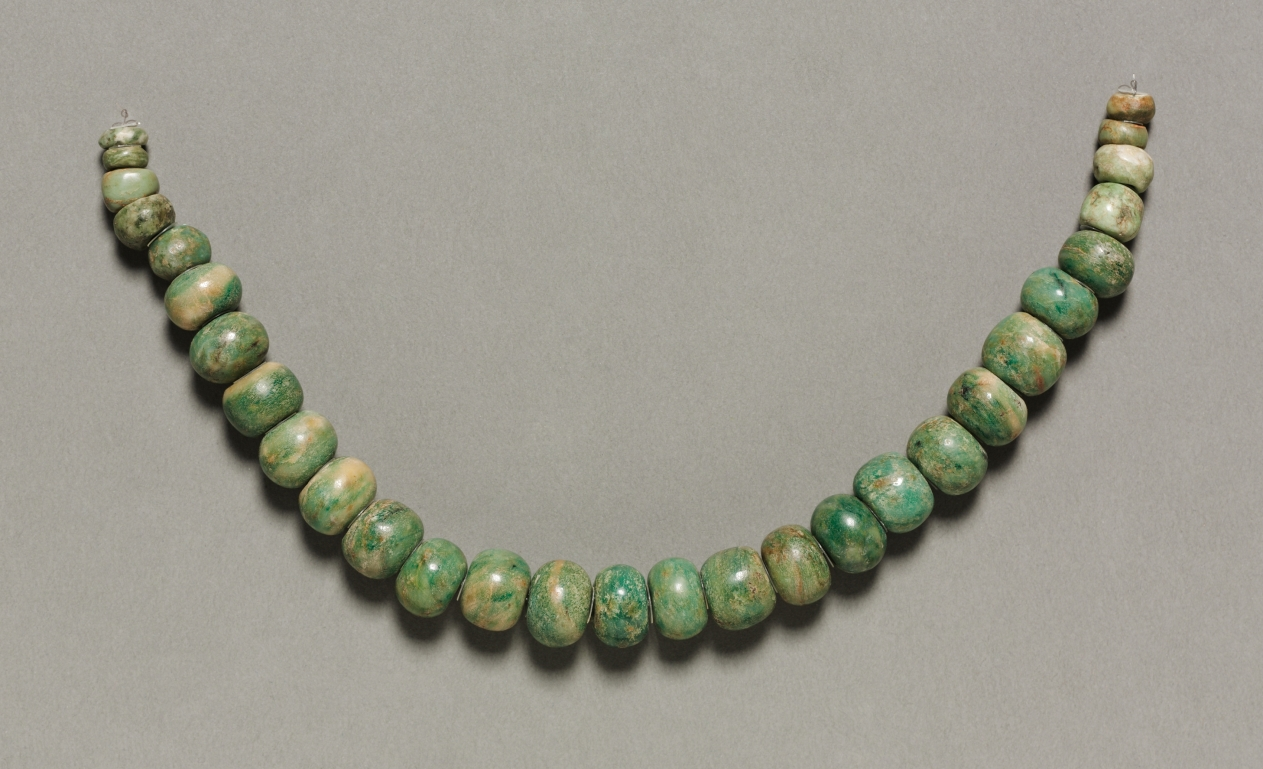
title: Necklace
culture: Central Mexico, Teotihuacán, Classic period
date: 150–200 CE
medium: jadeite-albitite?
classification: Jewelry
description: Near Teotihuacán’s largest palace is a temple ornamented with green-feathered serpents, symbols of the earth’s fertility. Beneath the temple were at least 120 human sacrifices, most men, many warriors, and some wearing greenstone ornaments like these, perhaps a set. The sacrifices may have consecrated the temple or a ruler’s tomb, or both.